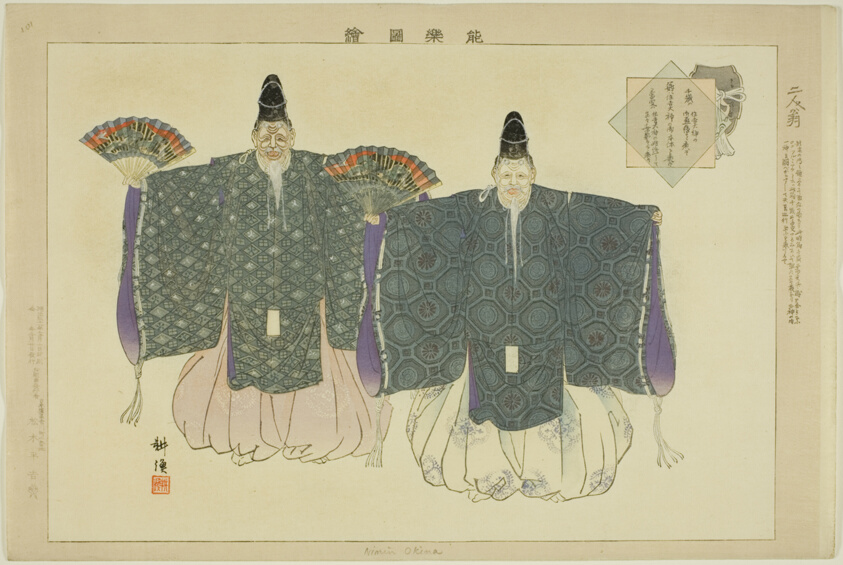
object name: Print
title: Nimin Okina, from the series "Pictures of No Performances (Nogaku Zue)"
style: Japanese (culture or style)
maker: Tsukioka Kogyo; Japanese, 1869-1927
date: 1898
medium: Color woodblock print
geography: Japan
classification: woodblock print; print; asian art